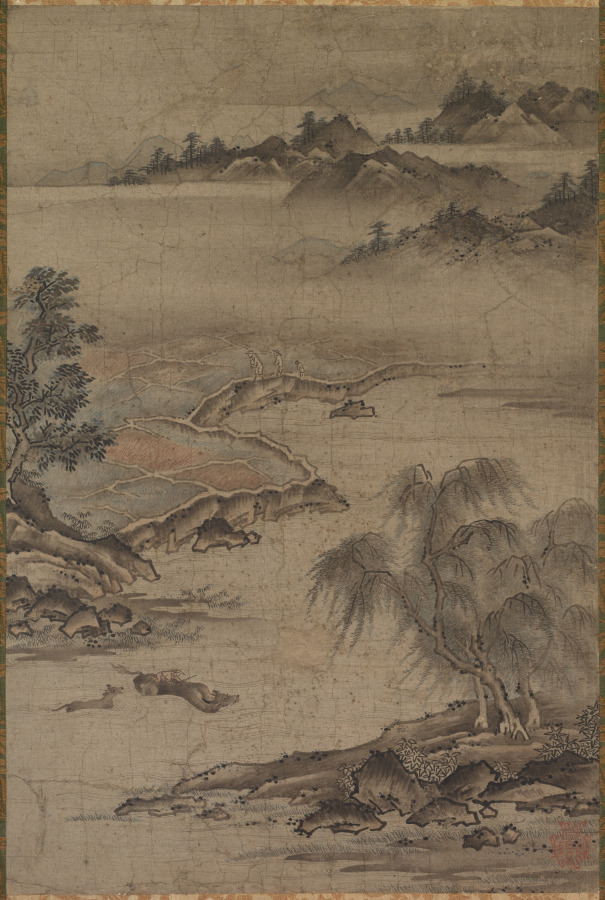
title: Farming and Herding Buffalo in Summer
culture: Japan, Muromachi period (1392–1573) to Momoyama period (1573–1615)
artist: Kano Hideyori (Japanese, active mid- to late 1500s)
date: mid- to late 1500s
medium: hanging scroll; ink and light color on paper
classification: Painting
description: Hideyori is most famous as the painter of a very early pair of genre screen paintings depicting people enjoying autumn foliage at a shrine-temple complex in Mount Takao near Kyoto. In this scene, people are hard at work farming their fields and herding water buffalo in summer. Such scenes were often associated with promoting the ideal of a prosperous realm, and also with the activities of the 12 months. Historical sources are divided on the biography of painter Kano Hideyori, but many scholars now believe he was the second son of Kano Motonobu, head of the Kyoto-based Kano family atelier.